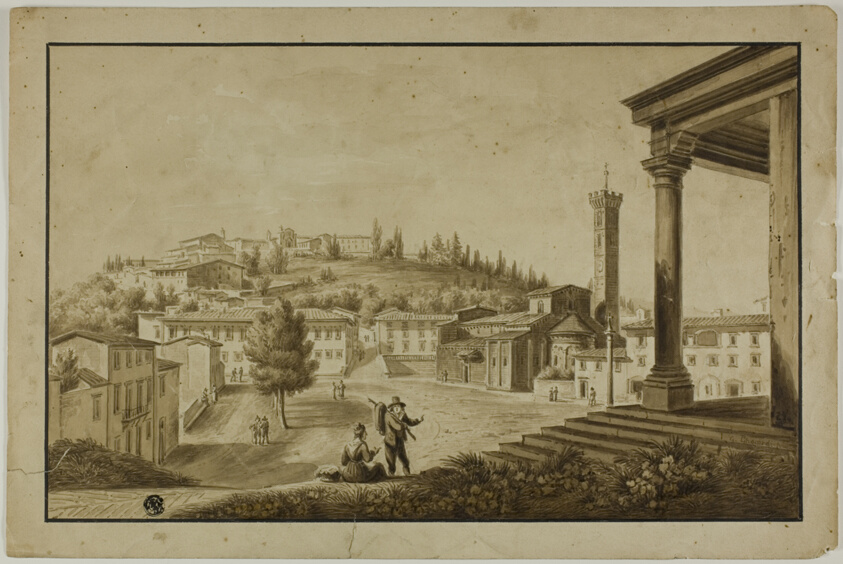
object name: Drawing and Watercolor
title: View of Piazza in Fiesole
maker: Giuseppe Gherardi (Italian, 1788/90-1884)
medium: Pen and brown ink, with brush and brown wash, over graphite, on cream wove paper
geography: Italy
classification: ink or chalk wash; drawings (visual works); prints and drawing